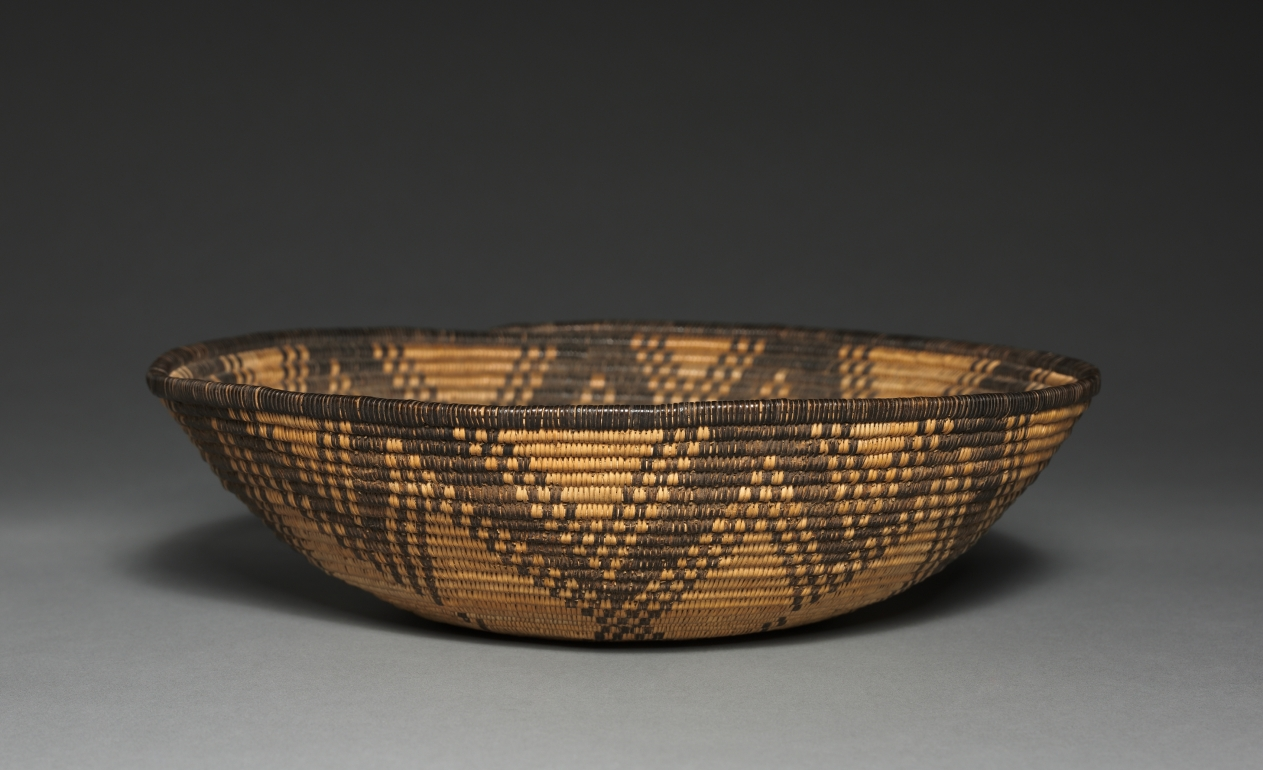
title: Tray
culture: Southwest, Apache, Western or Yavapao Apache, 20th century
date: c 1900–1939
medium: Devil's claw, Willow; Coiled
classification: Basketry